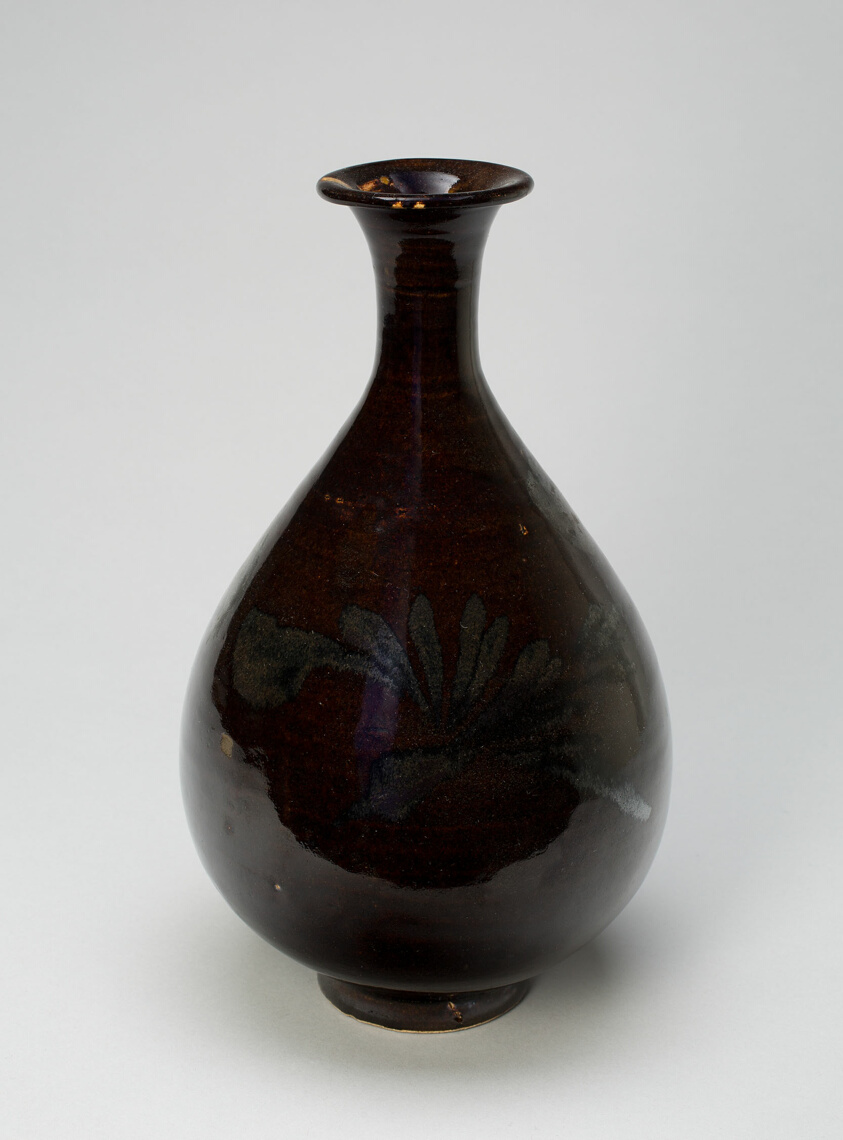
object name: Vessel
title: Pear-Shaped Bottle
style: Chinese (culture or style)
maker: China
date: Yuan dynasty (1279–1368), late 13th/early 14th century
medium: Cizhou ware; stoneware with dark-brown glaze and floral decoration in iron-brown slip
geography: China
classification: stoneware; asian art; ceramics; vessel